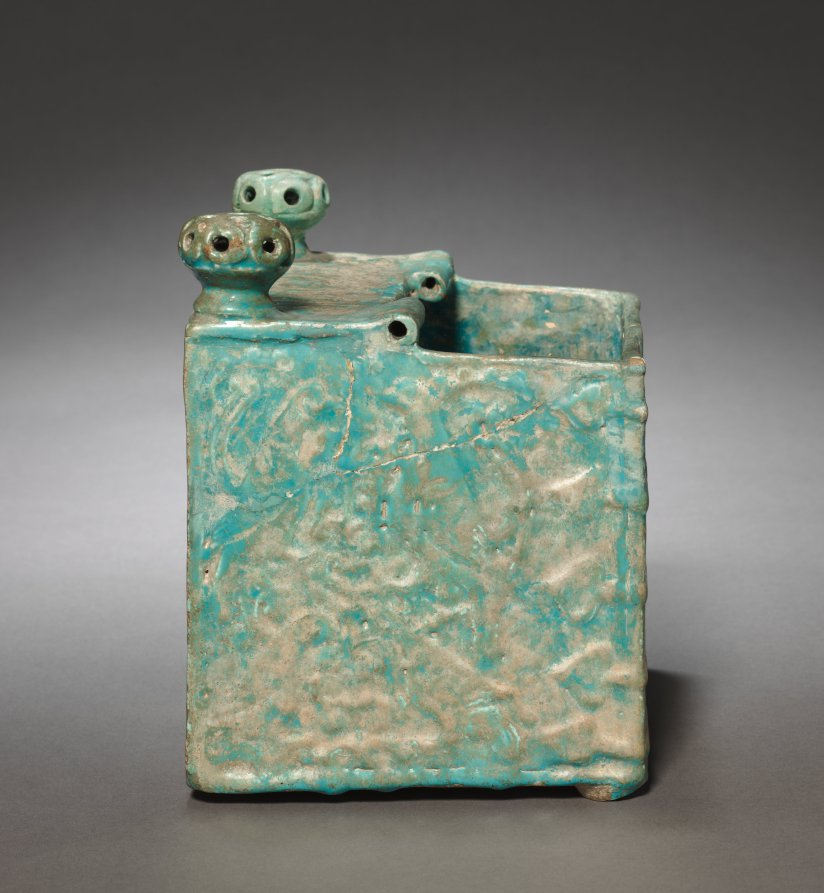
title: Casket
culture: Syria (Raqqa), Ayyubid Period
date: late 1100s–1200s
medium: fritware with molded design under glaze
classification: Ceramic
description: This square fritware box originally had a with hinged top. It is covered on the inside and outside with opaque turquoise glaze. The top back corners of the casket are surmounted by small openwork knobs. The casket would have rested on four feet, which have been lost. This is a ceramic imitation of a wooden box with metal fittings. The relief ornament imitates metal straps and a lock fitting.